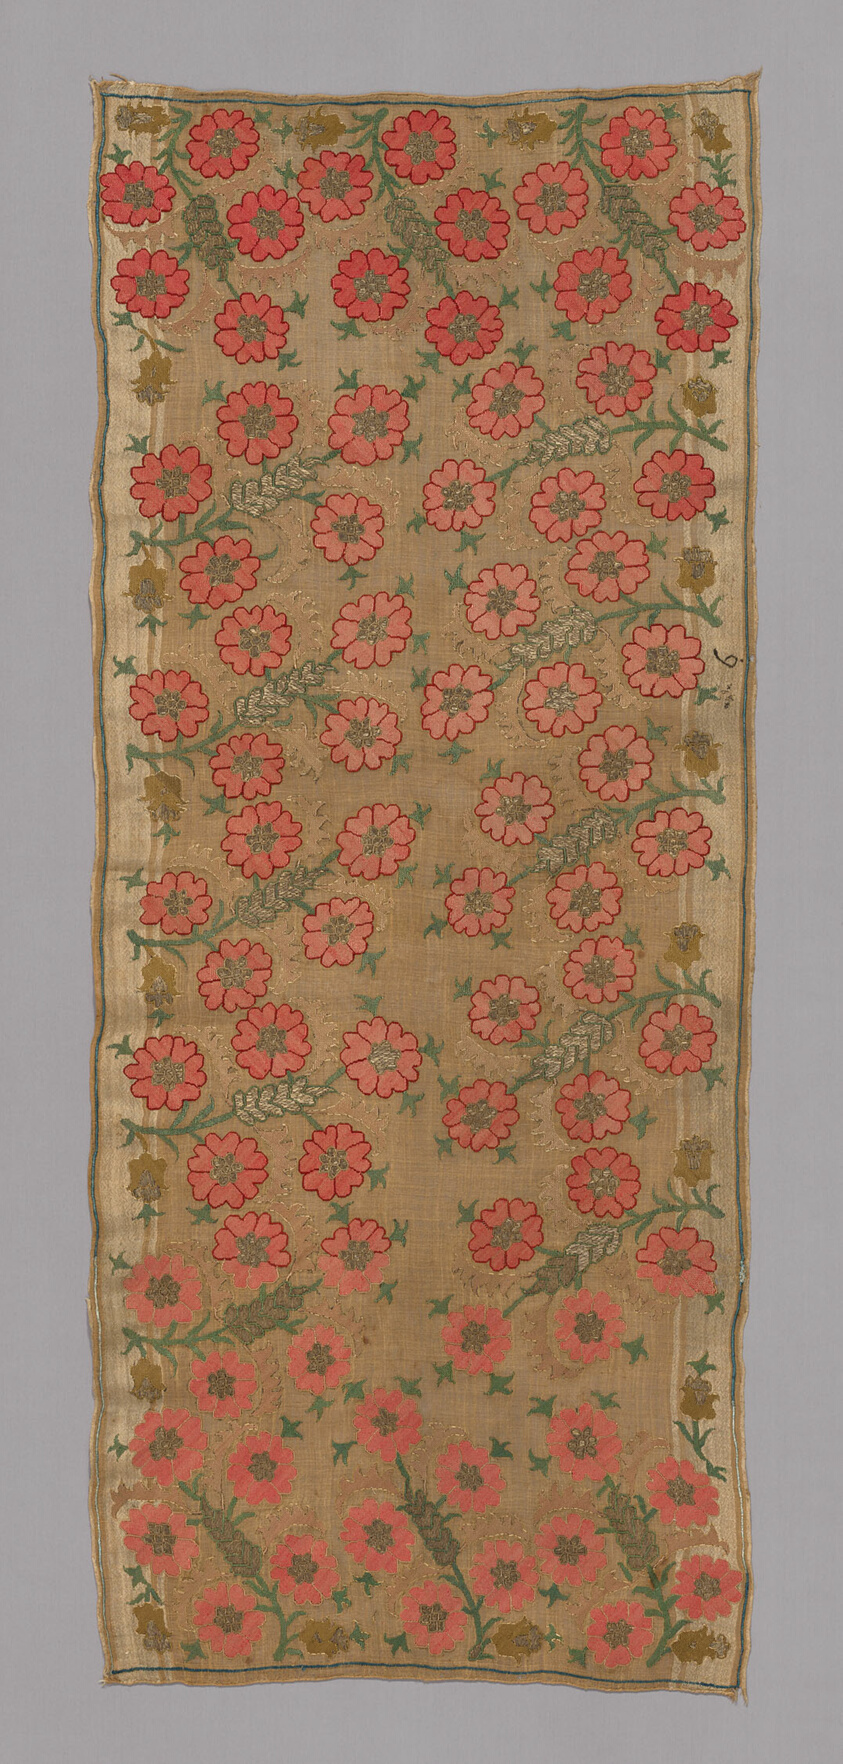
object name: Textile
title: Cover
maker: Turkey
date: 18th century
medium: Band, linen, with strips of natural silk at the sides. Cloth embroidered in all-over design of rose spray.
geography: Turkey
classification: textile; weaving; needlework (visual works)